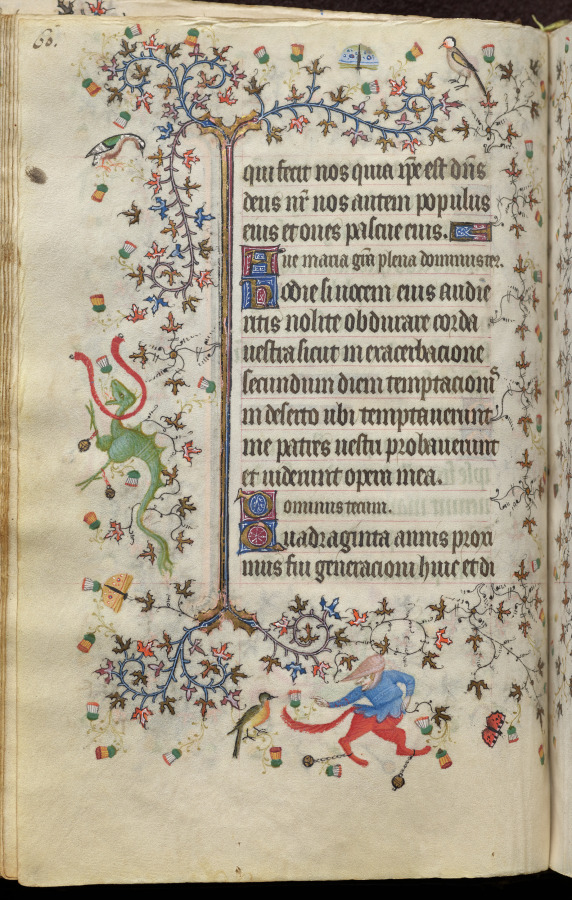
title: Hours of Charles the Noble, King of Navarre (1361-1425): fol. 30v, Text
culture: France, Paris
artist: Master of the Brussels Initials and Associates (French)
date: c. 1405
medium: ink, tempera, and gold on vellum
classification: Bound Volume